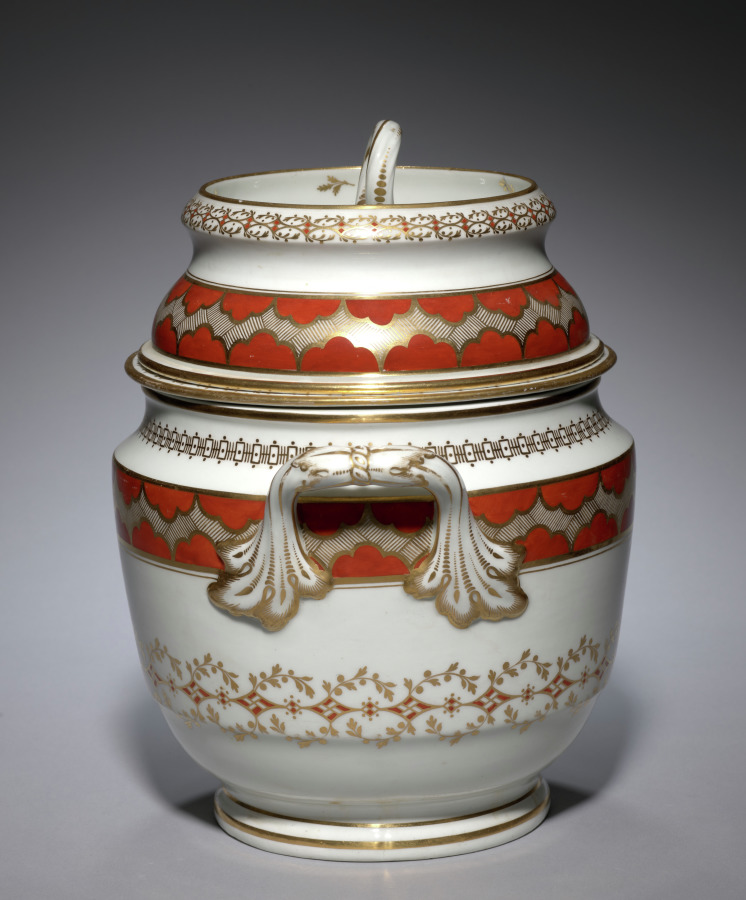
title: Ice Pail (2 of 2)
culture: England, late 18th-early 19th Century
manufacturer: Flight & Barr (British)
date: c. 1792–1804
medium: porcelain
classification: Ceramic